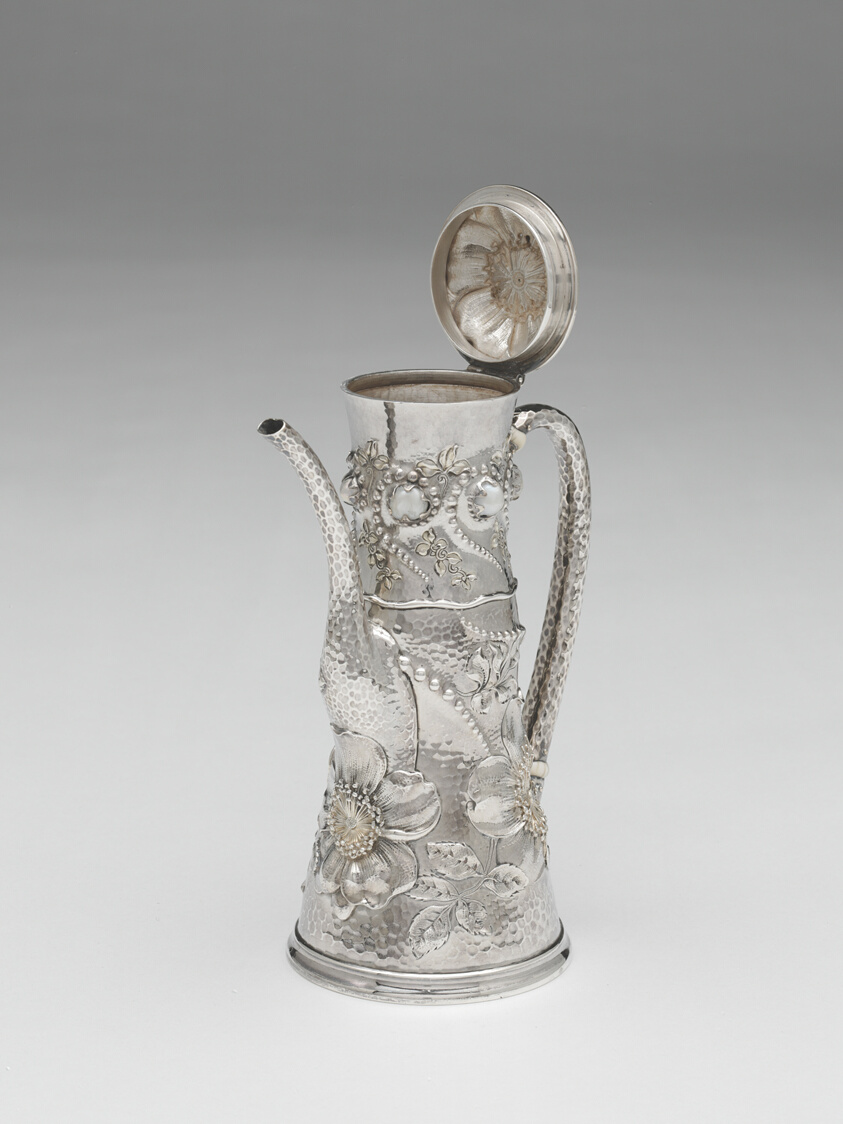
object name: Metalwork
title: Coffee Pot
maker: Design attributed to Charles Osborne (American, 1847–1920); Tiffany and Company (American, founded 1837); New York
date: 1881–89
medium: Silver, pearls, chalcedony, and ivory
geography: New York City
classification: coffeepot; silver; american decorative arts; american arts; decorative arts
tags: dining, drinking